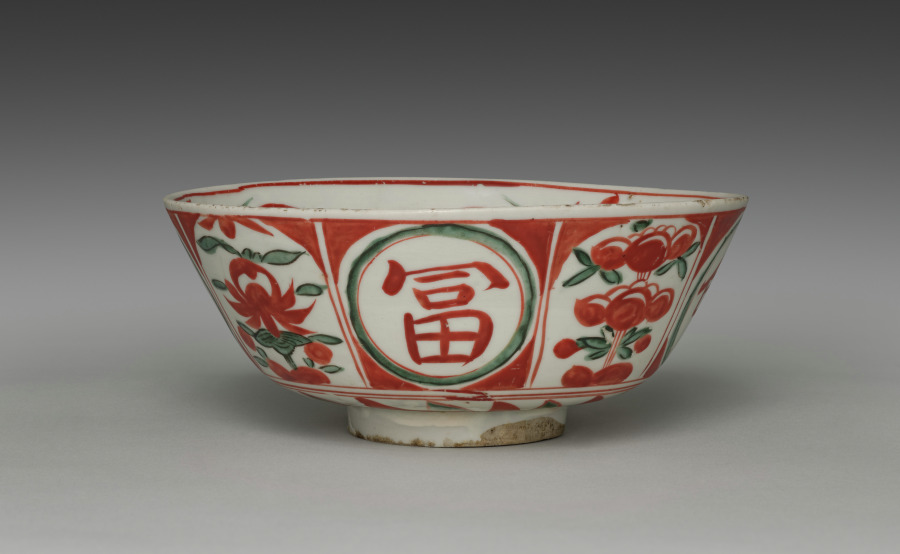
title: Bowl with Auspicious Ideographs and Floral Motifs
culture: China, Ming dynasty (1368–1644)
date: 1600s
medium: Stoneware with overglaze color enamels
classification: Ceramic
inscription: 長,命,富,貴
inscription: 【印】清風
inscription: 【印】大日本清風造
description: As part of their work, members of the Seifu studio, and Seifū Yohei III (三代清風与平, Japanese, 1851–1914), in particular, engaged in the viewing and appreciation of Chinese ceramics. While they were not authenticators, they would have been familiar with imported examples of Chinese stoneware and porcelain through tea gatherings, meetings with their elite clients, exhibitions, and other opportunities to see and study actual pieces from the mainland. This object and its box may be a reflection of Yohei III’s experiences of this kind. The bowl itself is slightly misshapen and roughly glazed with overglaze color enamels in red and green. Flanked by floral motifs, four Chinese characters brushed in red appear in roundels: 長命富貴. Meaning, respectively, longevity, life, prosperity, and status, they are pronounced together in Japanese as the phrase chōmeifūki, or “live long and prosper.” Additional loosely painted foliate designs in red and green circle the area above the foot and inside of the bowl. It is a relatively simple piece made by someone who was likely capable of much finer, more precise work but who could also do completely passable wares on short order. Of greater interest is the storage box lid for this piece. It has an inscription by Yohei III, with his seal, declaring it to be a “sweets dish from southern China with color images.” On the reverse of the lid, Yohei has written his name and placed his Imperial Household Artist seal, but instead of writing “made by,” he wrote “saw this [ceramic].” To the left of this is another inscription in a different hand, stating that the piece is a work from southern China with red-painted designs, produced at the very end of the Ming dynasty. It is signed “Kushi Takushin 久志卓真," along with his seal. Kushi Takushin (1898–1973) was a Japanese musician and music critic, as well as an antiques researcher and authenticator. He was especially interested in Ming dynasty Chinese ceramics and wrote extensively on Chinese, Japanese, and Korean ceramics. Originally from Hokkaido, he was active in Kyoto and began collecting art at a young age. Both he and Yohei appreciated and commented upon the bowl, and perhaps they both owned it.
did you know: Each roundel contains an auspicious word conveying good wishes for a long life and wealth.